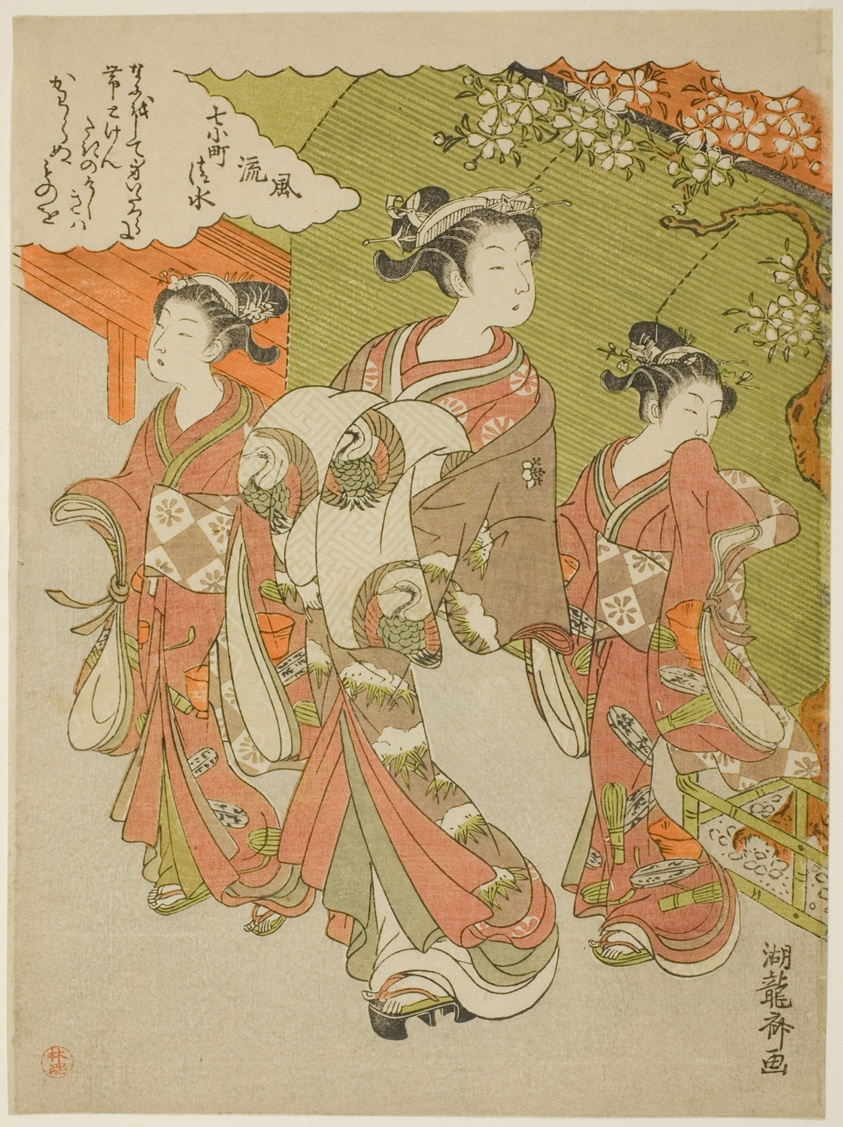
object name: Print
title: Ono no Komachi Visiting Kiyomizu Temple, from the series The Fashionable Seven Komachi (Furyu nana Komachi)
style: Japanese (culture or style)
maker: Isoda Koryusai (Japanese, 1735–1790)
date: Edo period (1615–1868), n.d.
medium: Color woodblock print; chuban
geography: Japan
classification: woodblock print; print; asian art